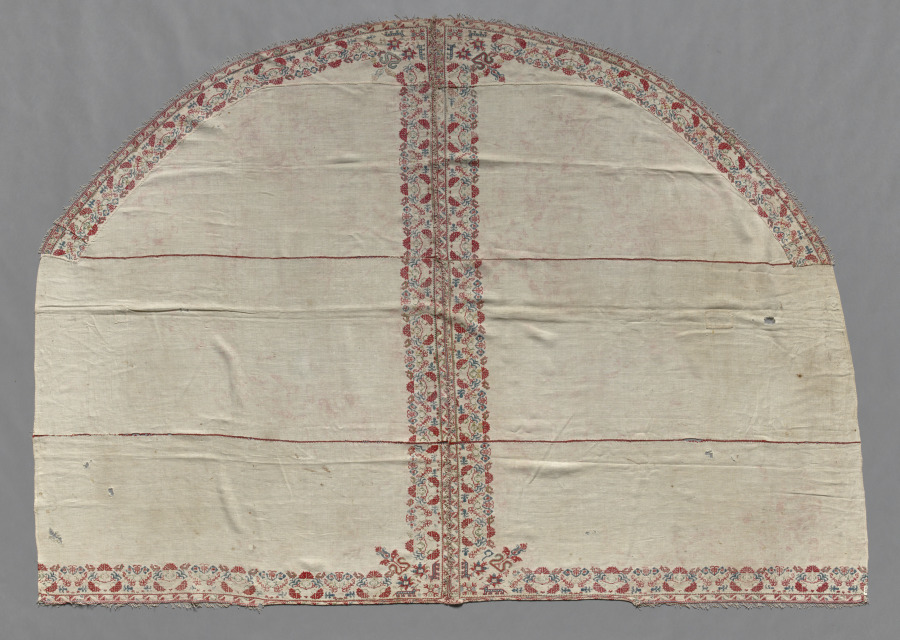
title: Part of a Bedspread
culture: Greece, Ionian Islands, 18th century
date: 1700s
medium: embroidery: silk on linen tabby ground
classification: Embroidery